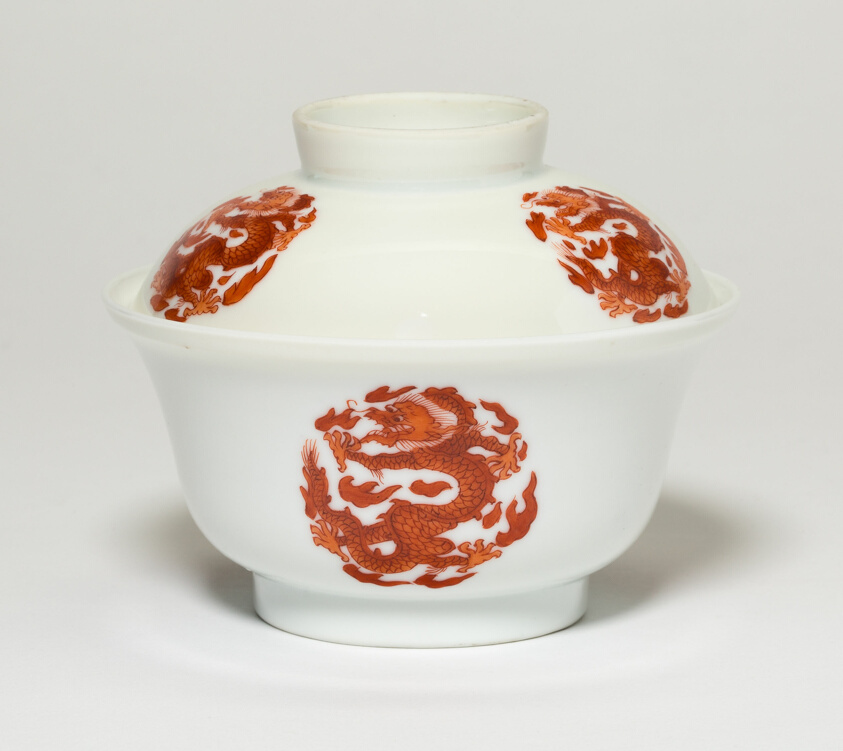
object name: Vessel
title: Covered Bowl with Dragon Medallions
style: Chinese (culture or style)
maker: China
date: Qing dynasty (1644–1911), late 18th/19th century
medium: Porcelain painted in underglaze red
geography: China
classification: bowl; porcelain; dish (vessel); asian art; ceramics; vessel